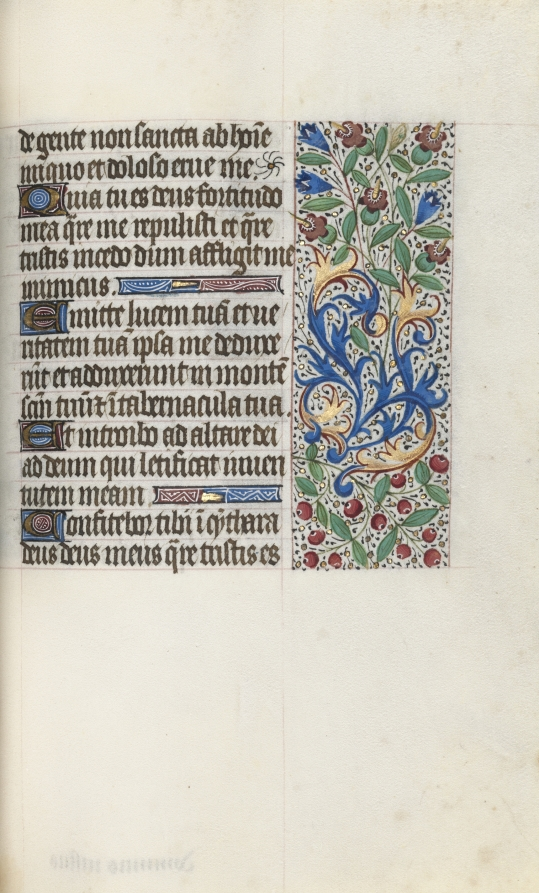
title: Book of Hours (Use of Rouen): fol. 76r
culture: France, Rouen, 15th century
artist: Master of the Geneva Latini (French, active Rouen, 1460–80)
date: c. 1470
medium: ink, tempera, and gold on vellum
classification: Bound Volume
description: In the late 1400s and early 1500s Rouen was an established and important center of book production. The city’s cathedral had a wealthy chapter that spent large sums of money to commission books and to maintain its extensive library. The stationers and booksellers would have likely been concentrated in or near the cathedral precinct. This artist, named after a manuscript now in Geneva, was Rouen’s principal illuminator during the second half of the 1400s.